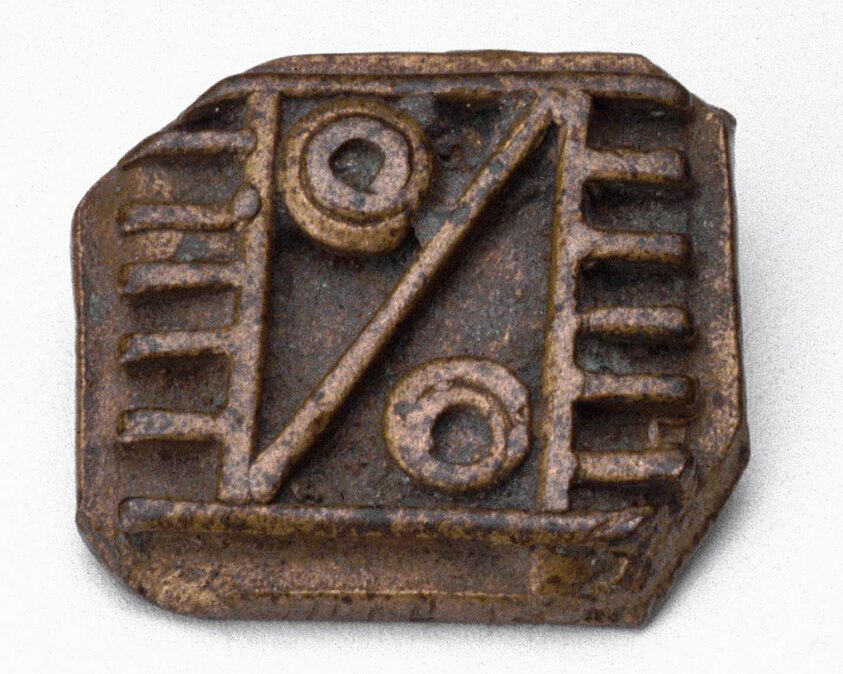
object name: Decorative Arts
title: Goldweight with a Geometric Design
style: asante, Arts of Africa, akan, african Art, Coastal West Africa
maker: Asante or related Akan-speaking peoples; Ghana; Coastal West Africa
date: 18th/19th century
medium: Copper alloy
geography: Ghana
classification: gold-weight; metal; arts of Africa; measure; african art; decorative arts